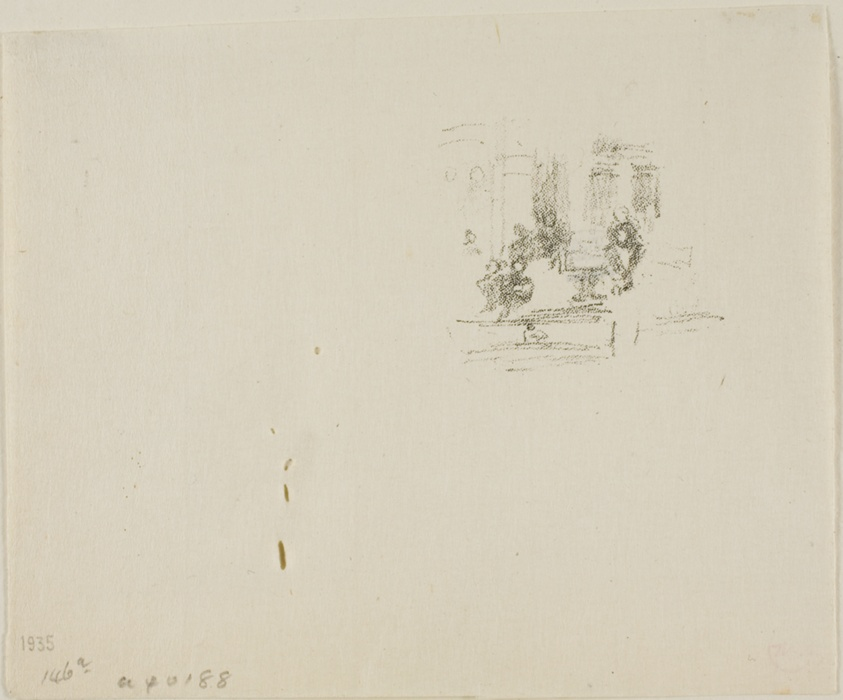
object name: Print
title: An Interior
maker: James McNeill Whistler (American, 1834-1903)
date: c. 1891, printed 1904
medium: Transfer lithograph in black on cream Japanese paper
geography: United States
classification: transfer lithograph; lithograph; print; prints and drawing; paper